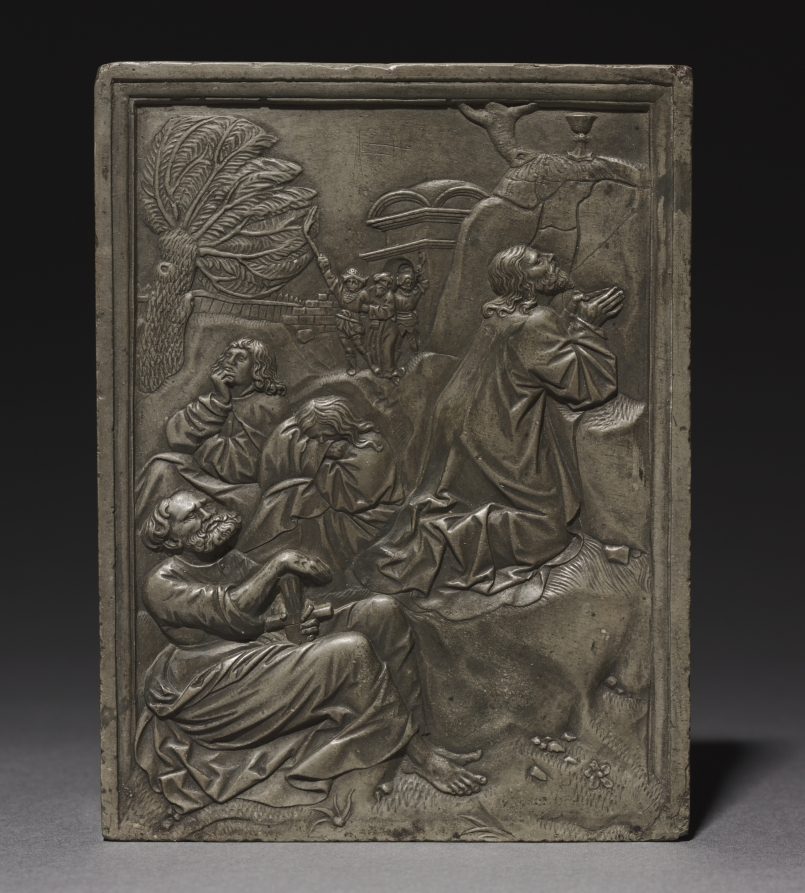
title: Christ in the Garden of Gethsemane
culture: Germany, Augsburg, 16th century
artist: Hans Daucher (German, c. 1485–after 1538)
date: 1500s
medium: Kelheim stone (fine-grained limestone)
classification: Sculpture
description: The artist made a mold from this relief in order to cast reproductions in metal.